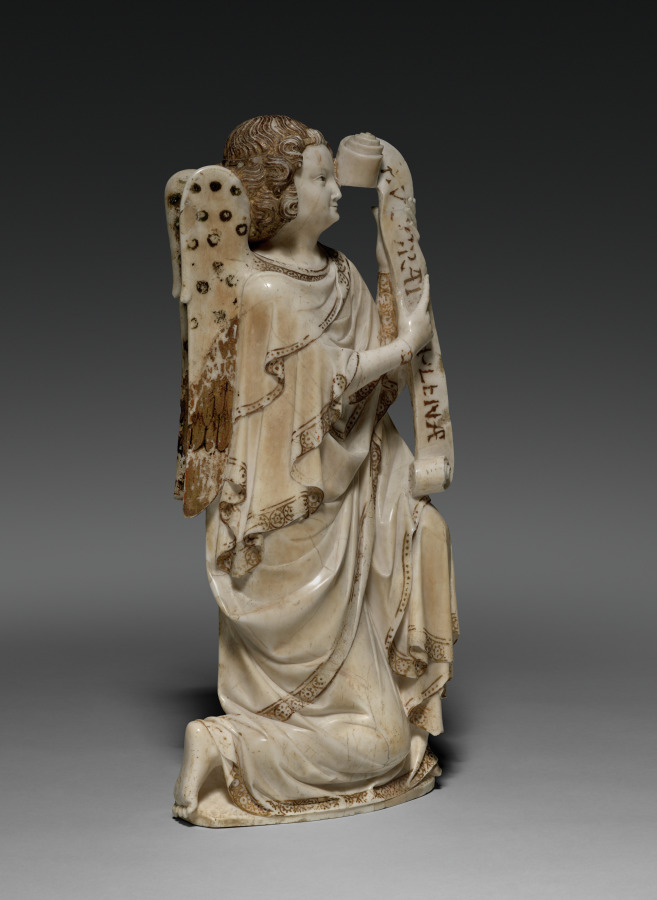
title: The Archangel Gabriel from an Annunciation Group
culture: France, Champagne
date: c. 1350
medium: alabaster with traces of paint and gilding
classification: Sculpture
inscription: Ave Maria, Gratia Plena.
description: In France, the use of alabaster began in the late 1200s for funerary monuments. The Archangel Gabriel, together with its counterpart, the Virgin Mary (now in the Louvre Museum, Paris) is part of an Annunciation. This is a rare example of alabaster sculpture from the 1300s. The alabaster comes from a quarry near Malaucène in Provence (France), making it an instance of long-distance trade of the rare material. Although the figure is very flat, it was likely made to also be viewed from the back, where there are remnants of gilding and the peacock feathers of the angel’s wing.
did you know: The surface of alabaster works can vary. By differentiating the intensity of polishing, it is possible for sculptures to create a surface with varying degrees of luster, or shine.